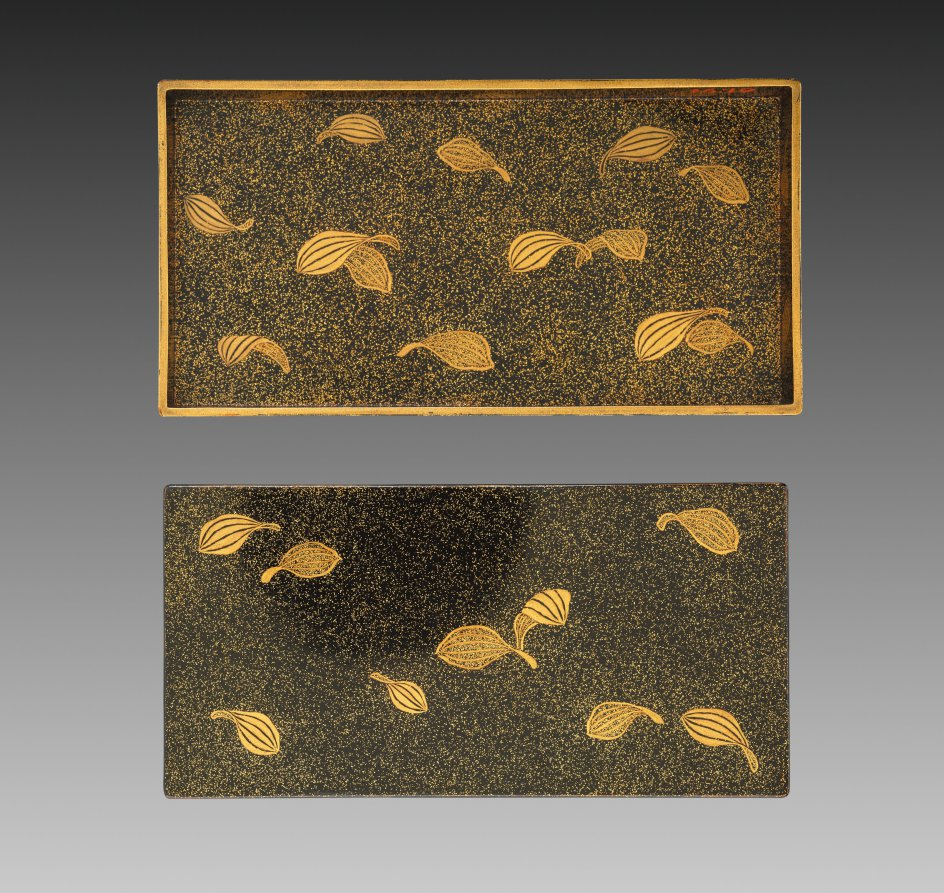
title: Fragment Mounted as a Box Cover with a Scene from Amida's Paradise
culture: Japan, Heian period (794–1185)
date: 1100s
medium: gold lacquer on wood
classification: Lacquer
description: The lid of this box has a fragment of an image representing the Pure Land of the Buddha Amida, and an interior decorated with lotus petals. The original, complete composition may have been a panel housed within a shrine cabinet, and used for meditation. An aversion to discarding sacred images likely led to the fragment’s incorporation into this small box.